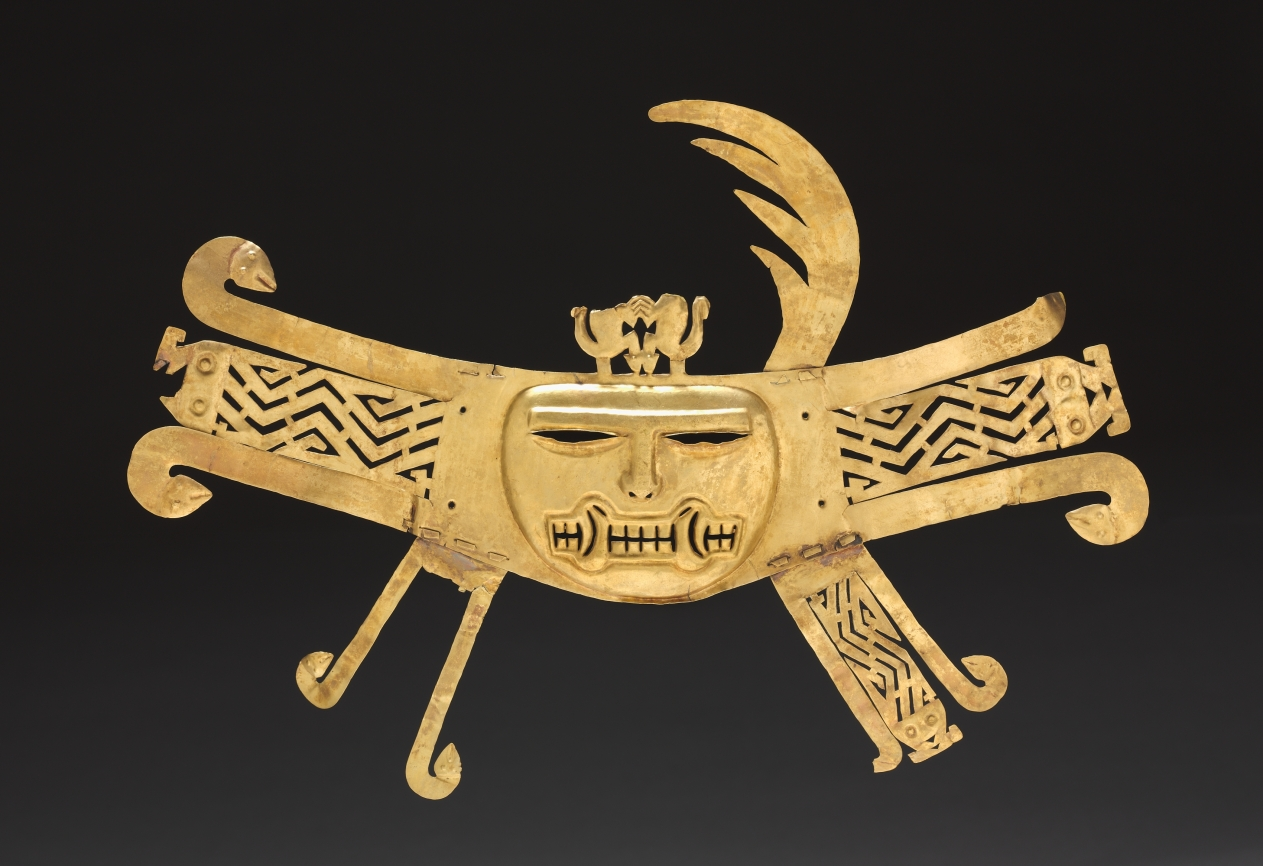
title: Mask Ornament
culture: Peru, Moche or Recuay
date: 1–550 CE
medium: cut and hammered gold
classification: Metalwork